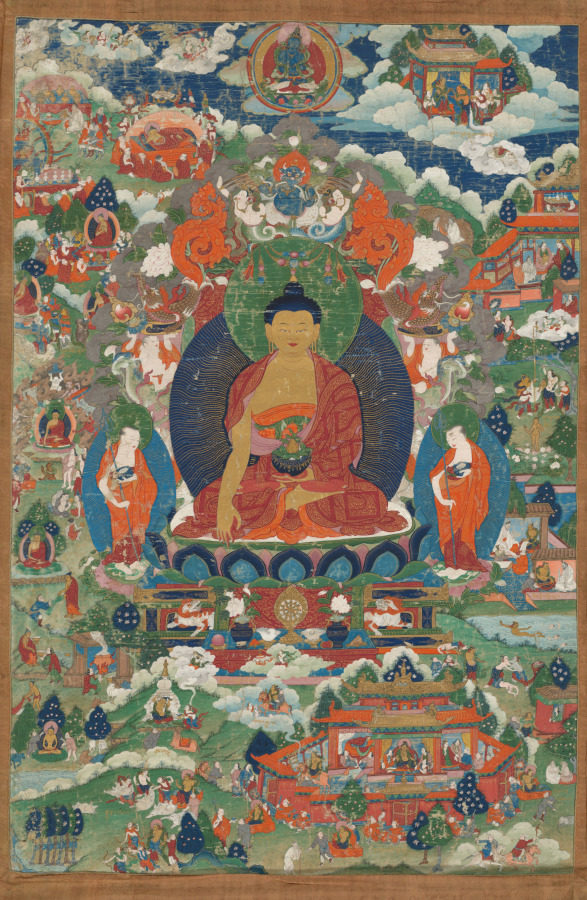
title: Shakyamuni Buddha with scenes from his life story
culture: Tibet, Qing dynasty (1644–1911)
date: c. 1700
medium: gum tempera on cloth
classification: Painting